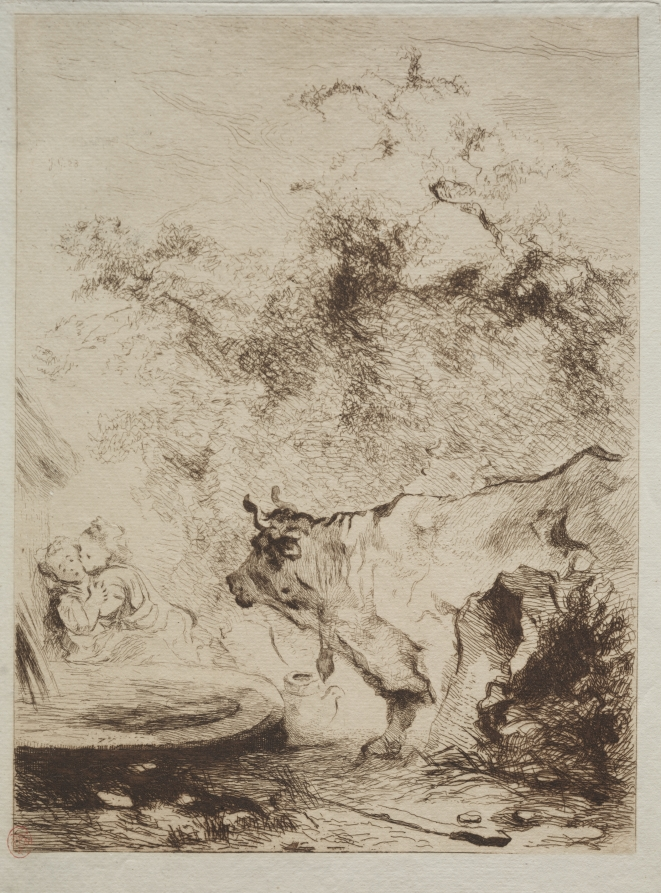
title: The Bull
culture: France, 19th century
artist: Jules de Goncourt (French, 1830–1870)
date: 1865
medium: etching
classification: Print